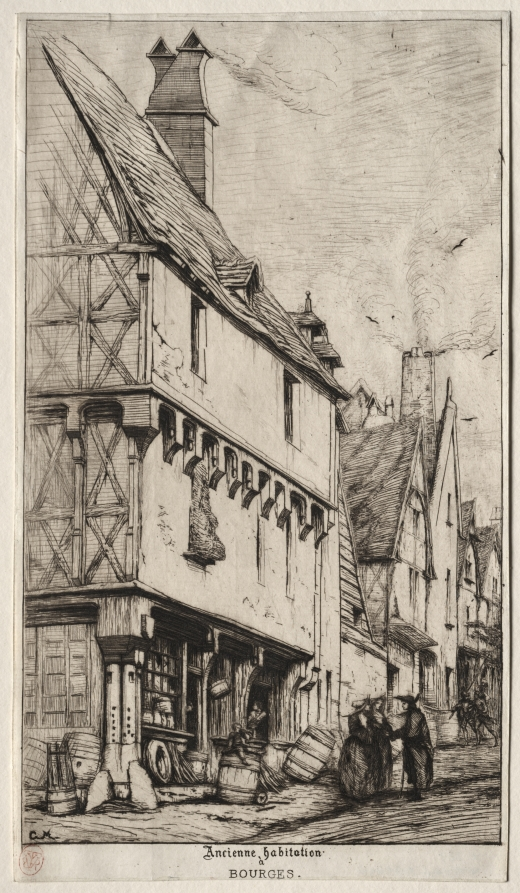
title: An Old House at Bourges, sometimes called the Musician's House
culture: France, 19th century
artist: Charles Meryon (French, 1821–1868)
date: 1860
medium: etching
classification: Print